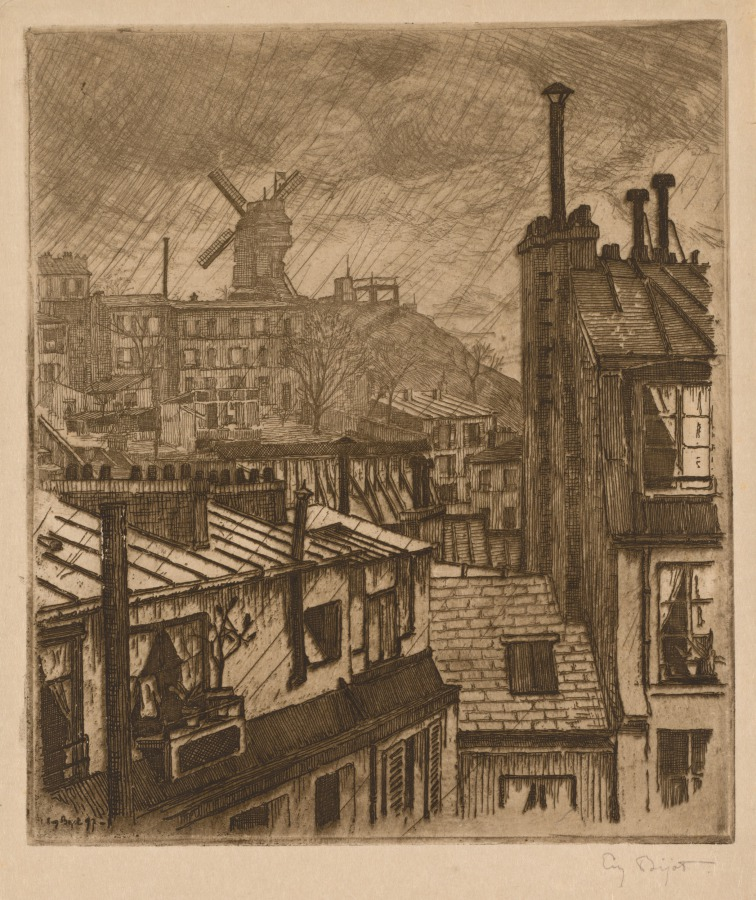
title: Montmartre, le Moulin de la Gallette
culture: France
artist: Eugène Bejot (French, 1867–1931)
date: 1897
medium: Etching and aquatint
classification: Print